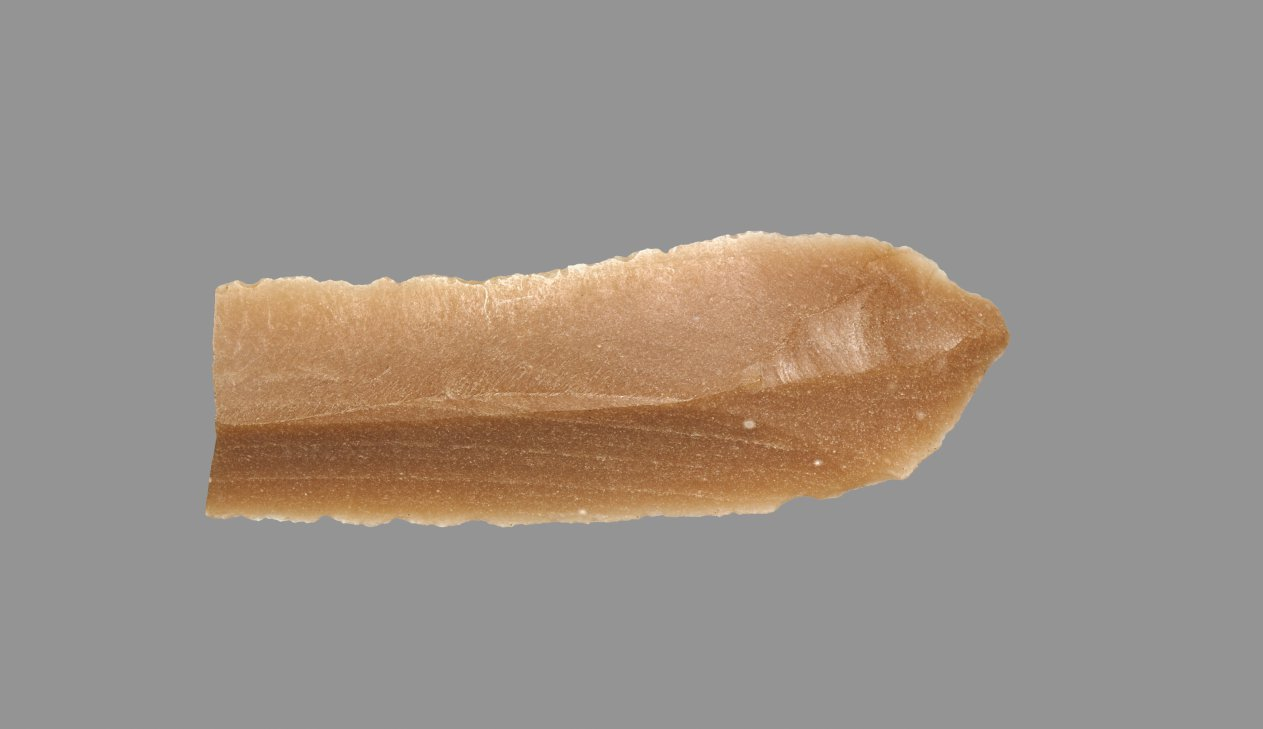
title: Sickle Blade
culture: Egypt, Middle Kingdom (2040–1648 BCE), Dynasty 12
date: 1980–1801 BCE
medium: flint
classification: Implements